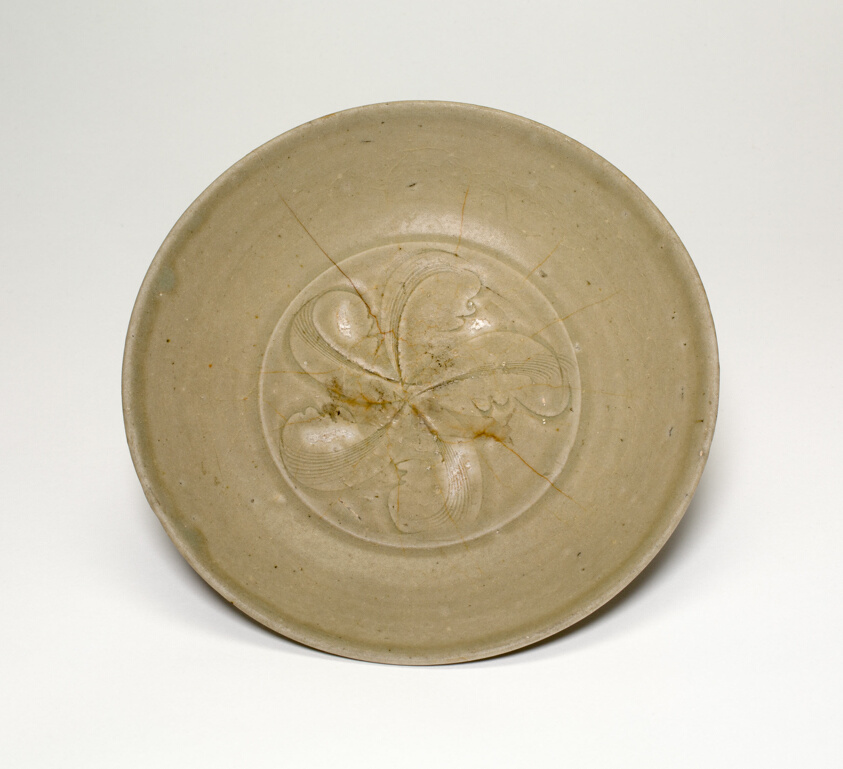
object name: Vessel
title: Dish with Floral Petals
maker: China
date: Song dynasty (960–1279)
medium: Yue-type ware; celadon-glazed stoneware with underglaze molded and incised decoration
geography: China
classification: ceramics; asian art; vessel